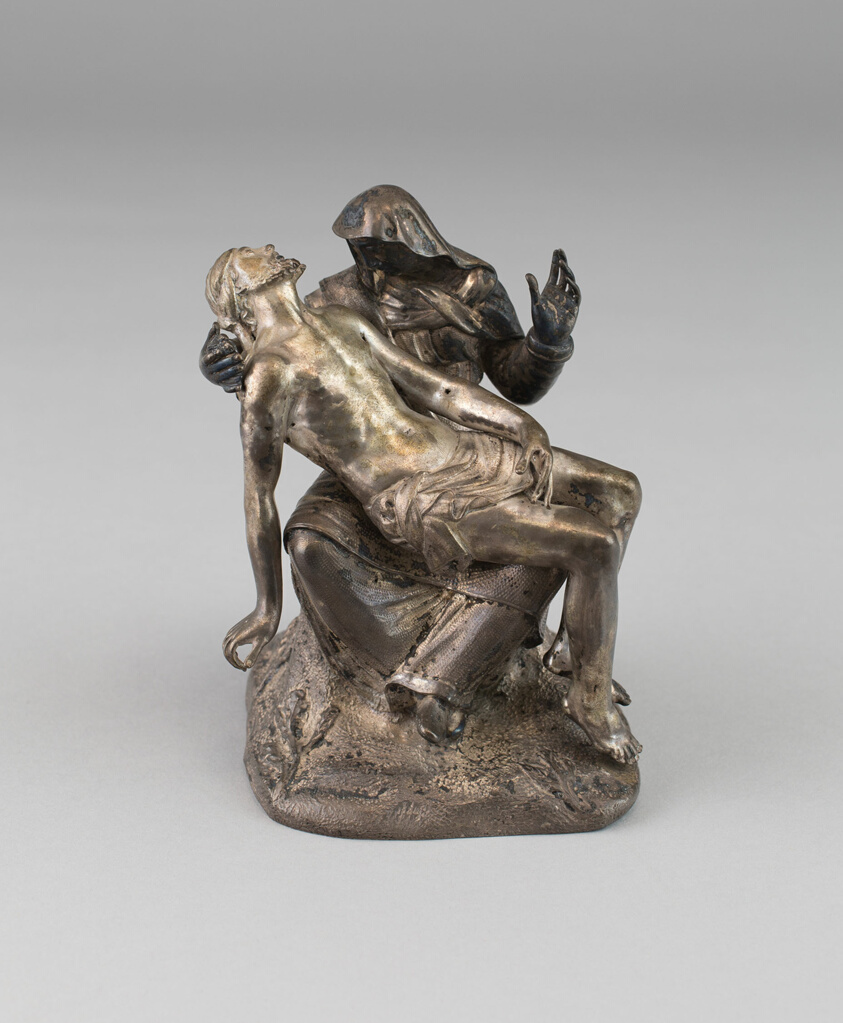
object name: Sculpture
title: Pietà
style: 18th Century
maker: German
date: 1700/25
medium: Silver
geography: Germany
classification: statuette; sculpture; figure; german; metal; silver; statue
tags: Christian subjects, biblical, Christianity, death, Jesus, mother, mother and child, mothers, Mourning, religion, religious, religious figures, religious scenes, sons, Virgin and child/Madonna and child, Virgin Mary